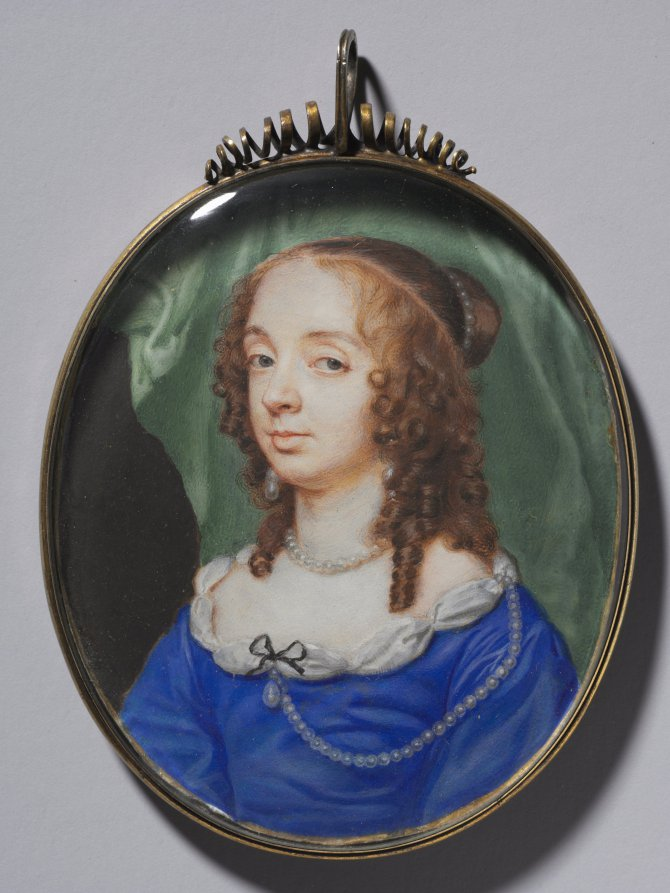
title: Portrait of a Woman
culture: England, 17th century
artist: Samuel Cooper (British, 1608/09–1672)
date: 1646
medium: watercolor on vellum with gold border in a silver gilt frame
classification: Portrait Miniature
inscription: signed right: S.C. / 1646.